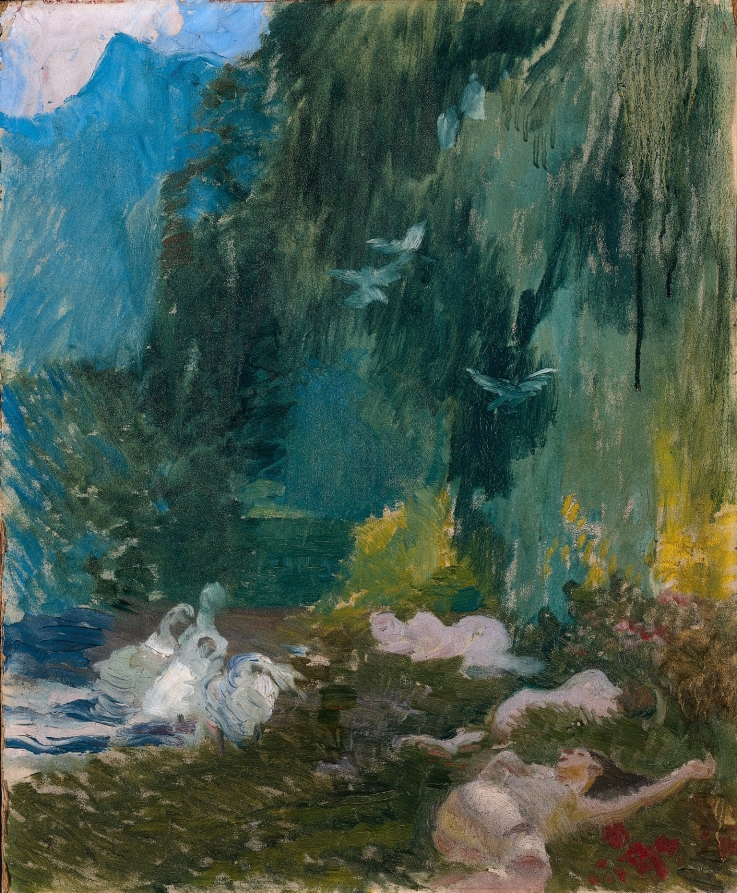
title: The Siesta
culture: France, 19th century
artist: Albert Besnard (French, 1849–1934)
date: c. 1890 – 1920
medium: oil on board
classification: Painting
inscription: Signed lower left: ABesnard [AB in monogram]